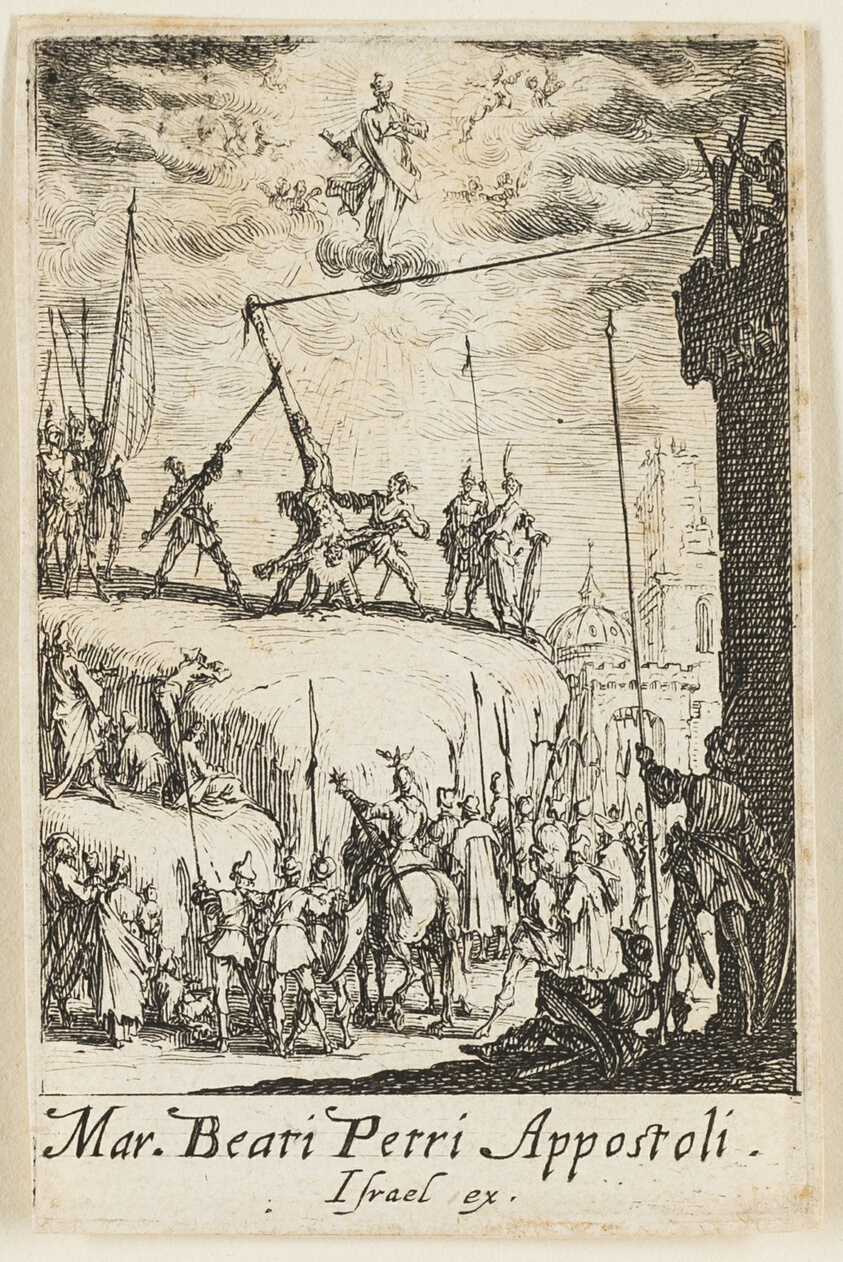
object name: Print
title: Martyrdom of Saint Peter, plate one from The Martyrdoms of the Apostles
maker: Jacques Callot (French, 1592-1635)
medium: Etching on paper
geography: France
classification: etching; print; prints and drawing